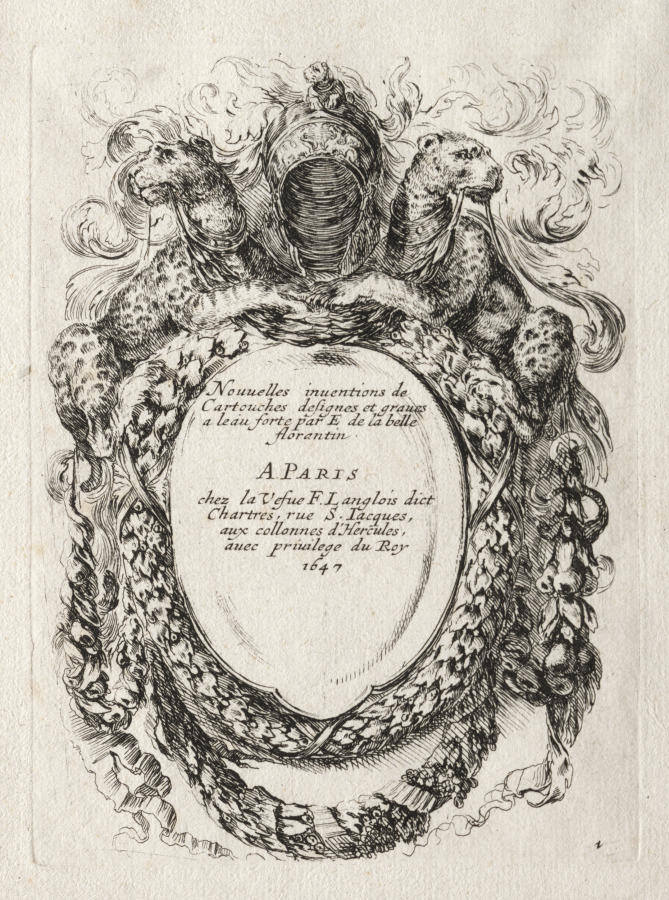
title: New Model for a Cartouche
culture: Italy, 17th century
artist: Stefano Della Bella (Italian, 1610–1664)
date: 1647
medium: etching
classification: Print